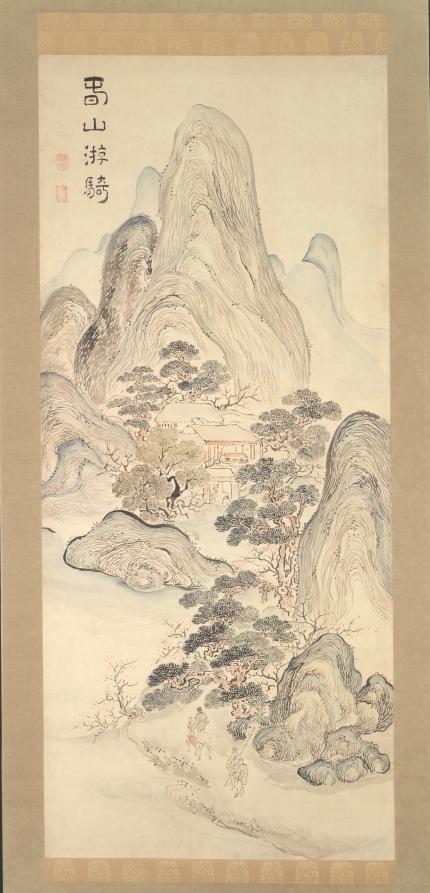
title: Spring Landscape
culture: Japan, Edo period (1615–1868)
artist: Ike Taiga (Japanese, 1723–1776)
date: 1700s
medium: hanging scroll; ink and color on paper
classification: Painting